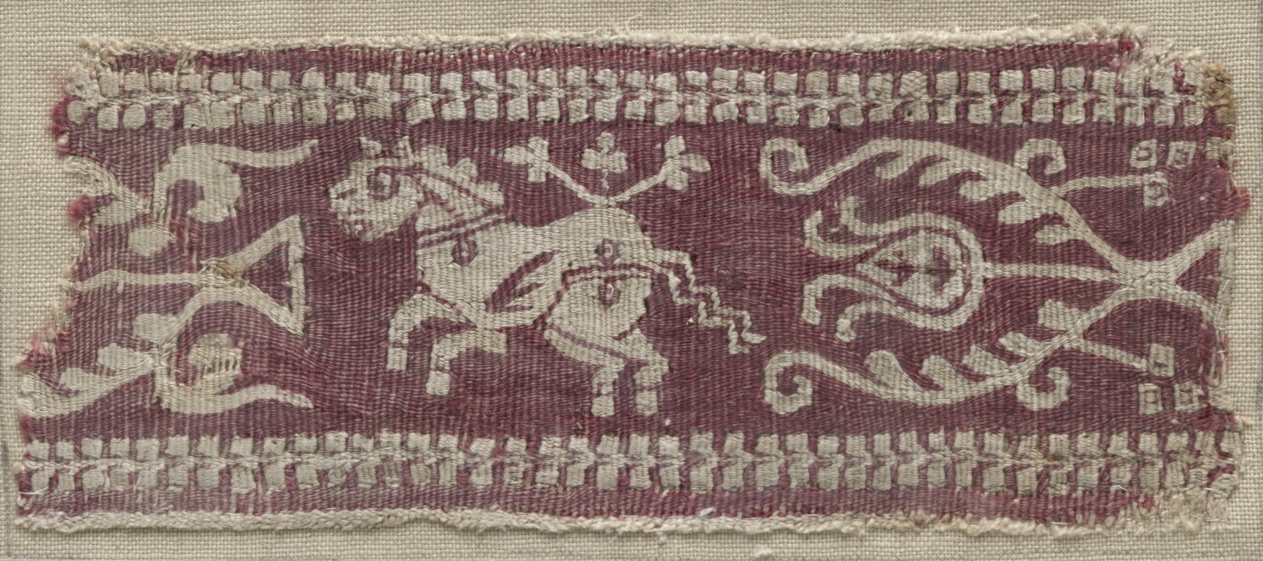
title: Fragment of a Band with Horse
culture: Egypt, Umayyad period (661–750) or Abbasid period (750–1258)?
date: 700s - 900s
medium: tapestry (originally inwoven in tabby ground); wool and linen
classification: Textile